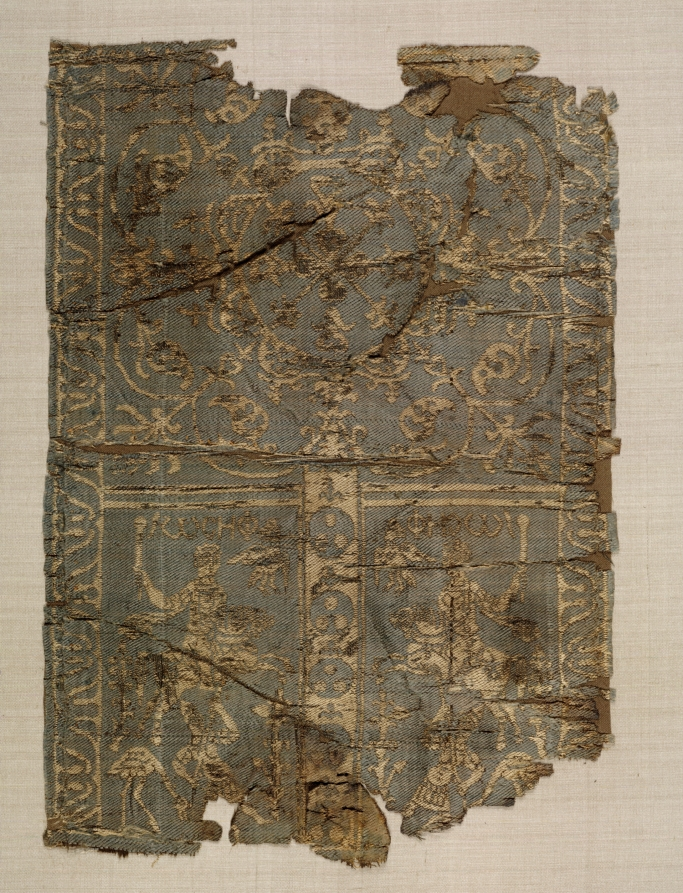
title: Silk Sleeve Decoration with Hunters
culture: Egypt or Syria, Umayyad period (661–750) or Abbasid period (750–1258)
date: 700s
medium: Silk: complementary weft-faced twill with inner warps (samit)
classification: Textile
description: This silk sleeve blends technical and stylistic elements that occurred in early Islamic art. The sides of the sleeve are decorated with a lotus flower design, an ancient Egyptian motif that was absorbed into Hellenistic and Byzantine art. The upper panel displays a large medallion composed of leaves and palmettes, common vegetal motifs in Islamic art of this period. Below, the mace-wielding horseman is identified in Coptic inscriptions as Joseph, father of Jesus and saint within the Coptic faith. The image is likely derived from the Byzantine representation of the victorious emperor.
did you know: At the bottom, men with spears hunt ostrich.